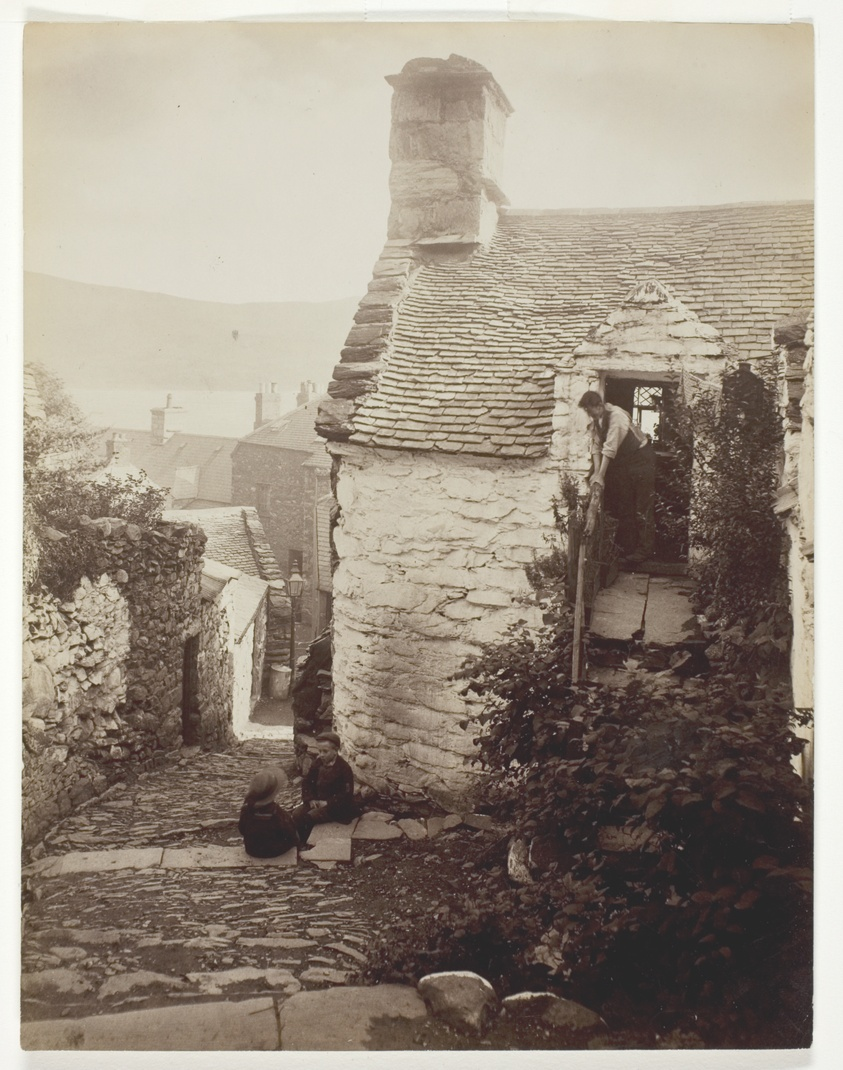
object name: Photograph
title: Old Barmouth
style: 19th century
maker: Francis Bedford (English, 1816–1894)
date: 1860/94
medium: Albumen print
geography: England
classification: albumen silver print; photographic process; photography; photograph